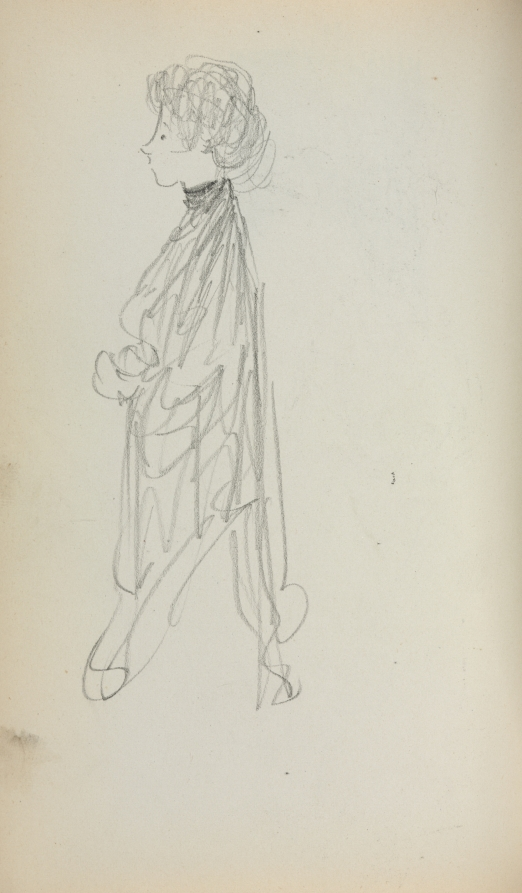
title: Italian Sketchbook: Standing Woman in Profile (page 51)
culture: America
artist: Maurice Prendergast (American, born Newfoundland [now Canada], 1858–1924)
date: 1898–1899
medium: pencil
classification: Bound Volume